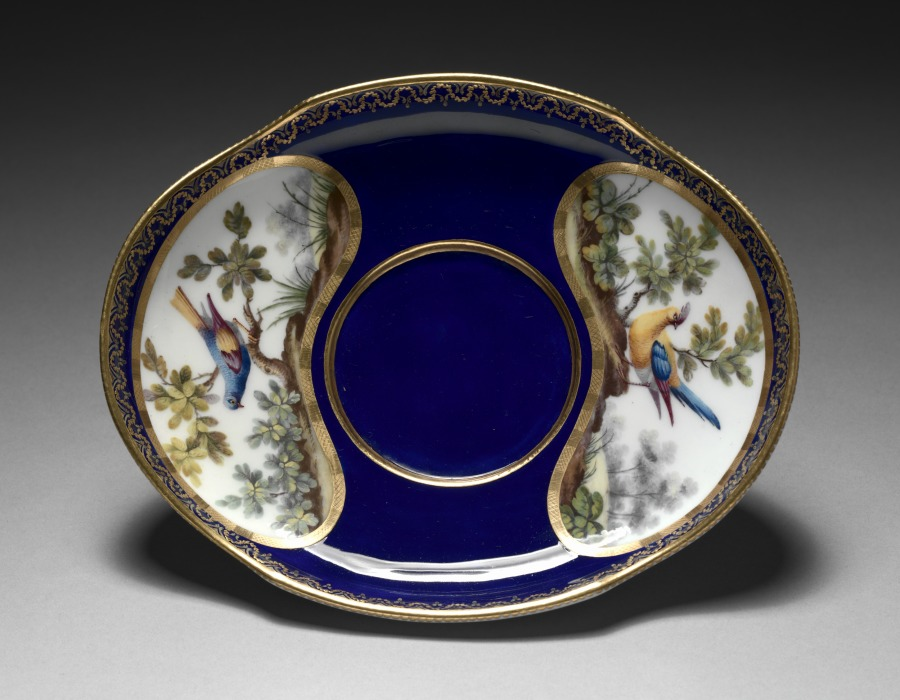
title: Stand for a Broth Bowl (Plateau Ovale)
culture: France, Sèvres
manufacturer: Sèvres Porcelain Factory (French, est. 1756)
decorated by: François-Joseph Aloncle (French)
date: 1772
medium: soft-paste porcelain with enamel an gilt decoration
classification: Ceramic